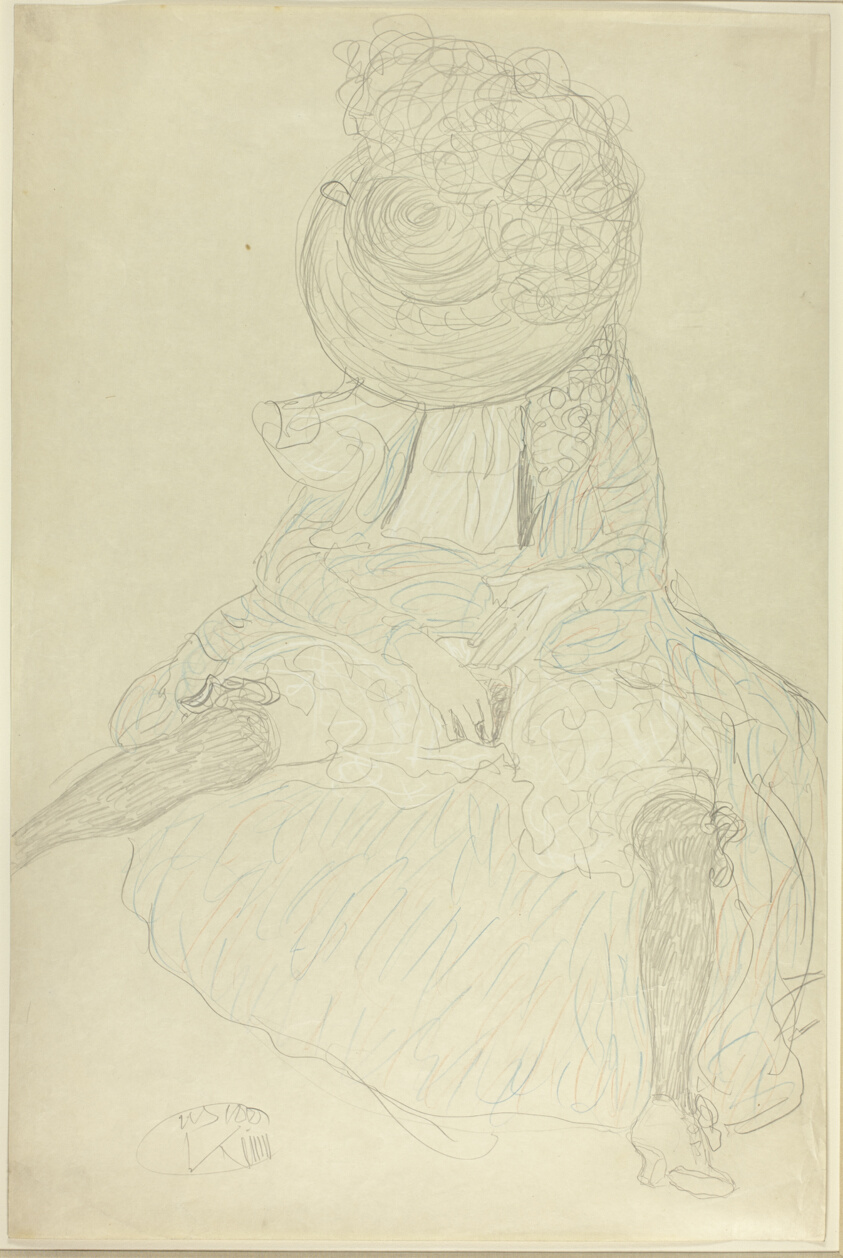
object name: Drawing and Watercolor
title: Seated Woman from the Front with Hat, Face Hooded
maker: Gustav Klimt (Austrian, 1862-1918)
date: 1910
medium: Graphite, with colored pencil, on ivory wove paper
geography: Austria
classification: drawings (visual works); colored pencil; graphite; prints and drawing